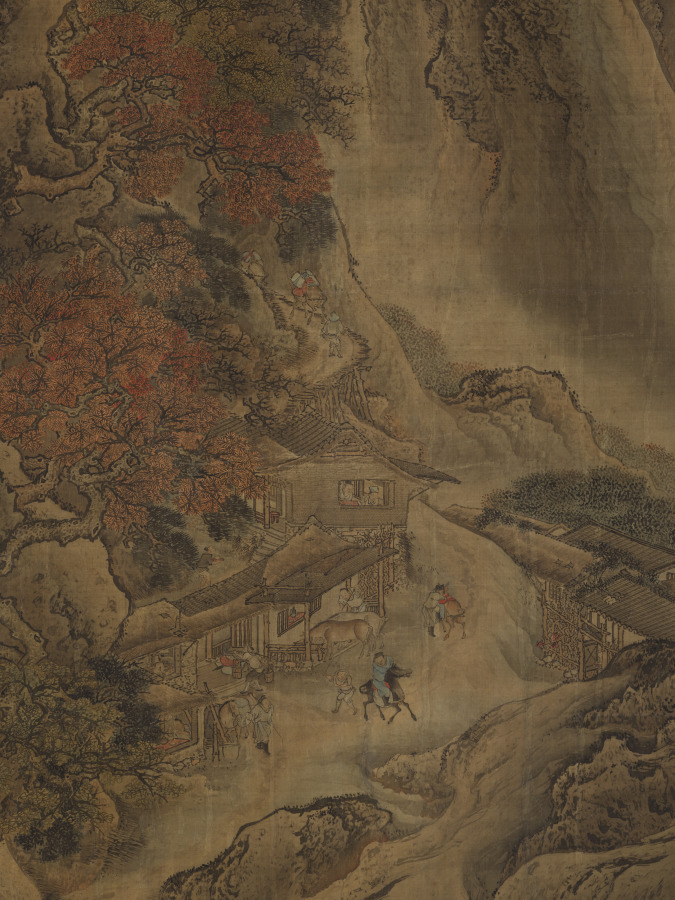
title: Road to Shu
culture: China, Qing dynasty (1644–1911), Qianlong reign (1736–95)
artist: Yuan Yao (Chinese, active mid-1700s)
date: 1743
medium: Hanging scroll; ink and color on silk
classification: Painting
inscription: artist's seals: yuan yao shi yin 袁耀 之印, zhao dao shi 昭道 氏 two collector’s seals: jin ju and illegible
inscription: Shu han xinglü //shi guihai xia //Hanshang Yuan Yao hua// 蜀椷行旅时癸亥夏- 邗上 袁耀 画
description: Few works by the Yuan workshops in Yangzhou present a continuous composition of such monumental scale as this hanging scroll. Road to Shu (in Sichuan province) depicts the trade of goods over long distances and through mountainous terrain. Busy travelers lead mules over footbridges, mountain paths wind along steep slopes, and soaring bridges connect peaks divided by deep gorges. The Yuan studios produced paintings to decorate the residences of wealthy Yangzhou salt merchants and princely palaces. The title Road to Shu refers to the historical drama of the flight of Tang emperor Xuanzong (reigned 712–56) to Sichuan in the aftermath of the An Lushan Rebellion (755–63). At the same time, the scenery alludes to Anhui, the mountainous native country of many of the salt merchants and their trade routes in northern parts of the empire.